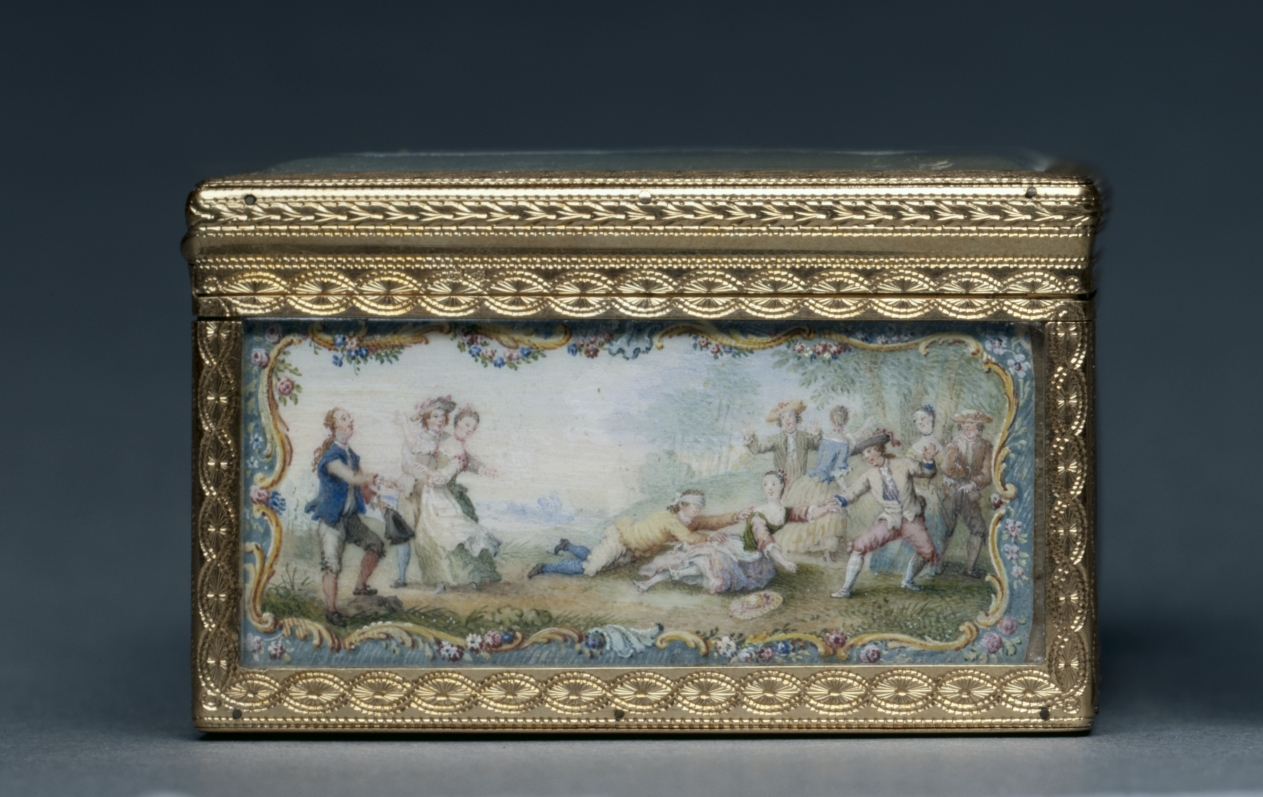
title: Snuff Box (Tabatière)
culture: France, 18th century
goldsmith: Jean Ducrollay (French, 1709–1787)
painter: Louis Nicolas van Blarenberghe (French, 1716–1794)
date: 1753–54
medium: gold and glass with miniatures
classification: Metalwork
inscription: [Maker's mark of Jean Ducrollay, master goldsmith in 1734, inside cover; bottom; right side]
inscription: [Charge mark of Julien Berthe, Paris, 1750-1756, inside cover; bottom; right side]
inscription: [Discharge mark of Julien Berthe, Paris, 1750-1756, on bezel]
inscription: [Inscribed on miniature, front side]: "V.[an] Blarenberghe/1753"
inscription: [Warden's mark for Paris, 1763-1754, inside cover; bottom; right side]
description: In 18th-century France ornately enameled boxes that held snuff—powdered tobacco—became a popular accessory in the French court. This object’s rectangular shape differs from early work attributed to Jean Ducrollay. Though the light colors, floral borders, and depictions of lively outdoor recreation are representative of earlier rococo imagery, the rectangular shape and simple frieze make it a primary example of rising neoclassicism.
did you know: The Ducrollay family was one of the most sought-after Parisian goldsmith workshops under the reign of French King Louis XV.